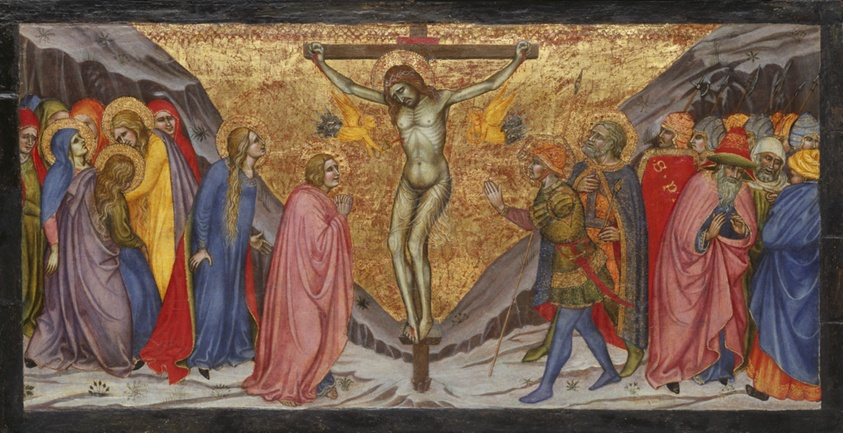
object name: Painting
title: The Crucifixion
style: 15th century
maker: Taddeo di Bartolo (Italian, 1362/63–1422)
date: 1401/04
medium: Tempera on panel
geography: Italy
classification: tempera; paint; Italian; painting; european painting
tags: Century of Progress, crucifixions, death, religion, religious, religious figures, religious scenes, Christian subjects, Christianity, biblical, men, women, Mourning, saints, Virgin Mary, Jesus, mother, sons, soldiers, armor, helmets, spears, swords, angels, gold (color), world's fairs, Chicago World's Fairs